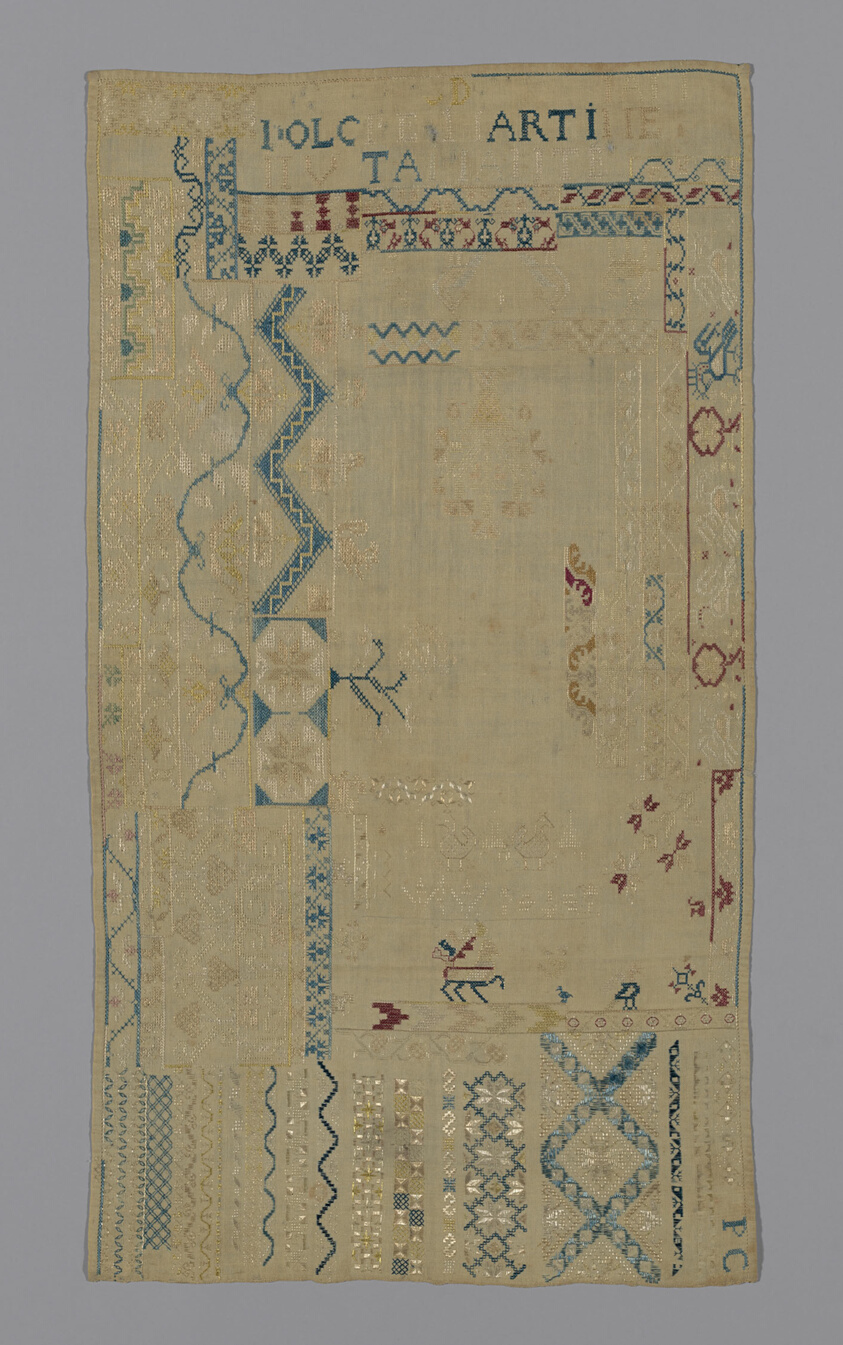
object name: Textile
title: Sampler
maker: Mexico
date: 19th century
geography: Mexico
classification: textile; needlework (visual works); weaving; sampler